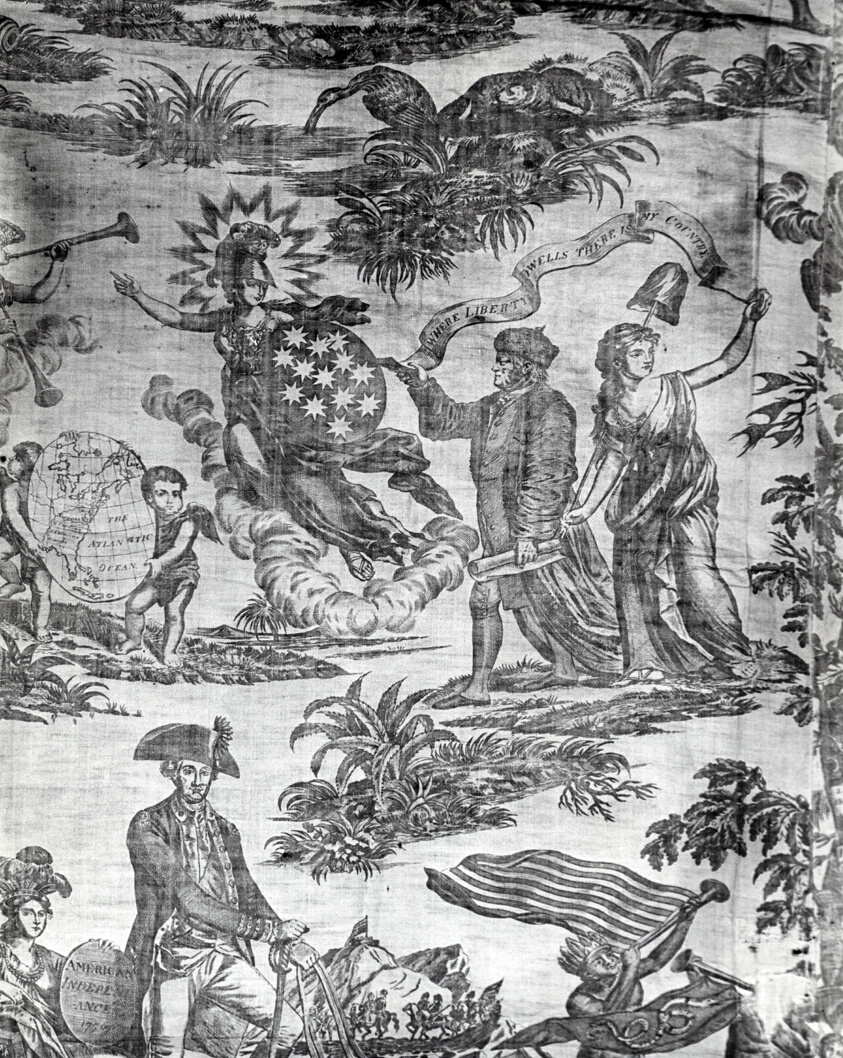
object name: Textile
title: Apotheosis of Franklin (Furnishing Fabric)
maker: After mezzotint by Valentine Green (English, 1739-1813) and after portrait by John Turnbull (American, 1756-1843) after terracotta medallion by Jean-Baptiste Nini (Italian, 1717–1786); England, made for the American market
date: c.1785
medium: Cotton, plain weave; copperplate printed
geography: England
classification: textile; weaving - printed; furnishing textile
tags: propaganda